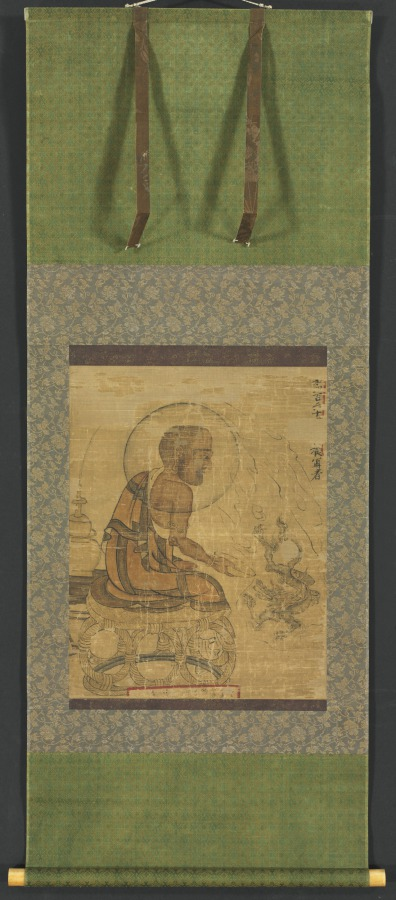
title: Arhat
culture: Korea, Goryeo dynasty (918–1392)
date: 1235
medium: Hanging scroll; ink and slight color on silk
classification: Painting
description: An arhat (Nahan in Korean), an advanced disciple of the Buddha, is represented here in profile with a halo encircling his head. This particular arhat is Segongyang jonja, numbered as the 464th of 500 arhats. He sits on a woven bamboo stool, is luring a dragon into an alms bowl. This hanging scroll is one of only about ten known works that survive today, all of which (except for Cleveland’s piece) are currently preserved in Korea or Japan.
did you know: This painting that depicts an arhat, a human being who has achieved enlightenment, used to be part of a set of 500 hanging scrolls.